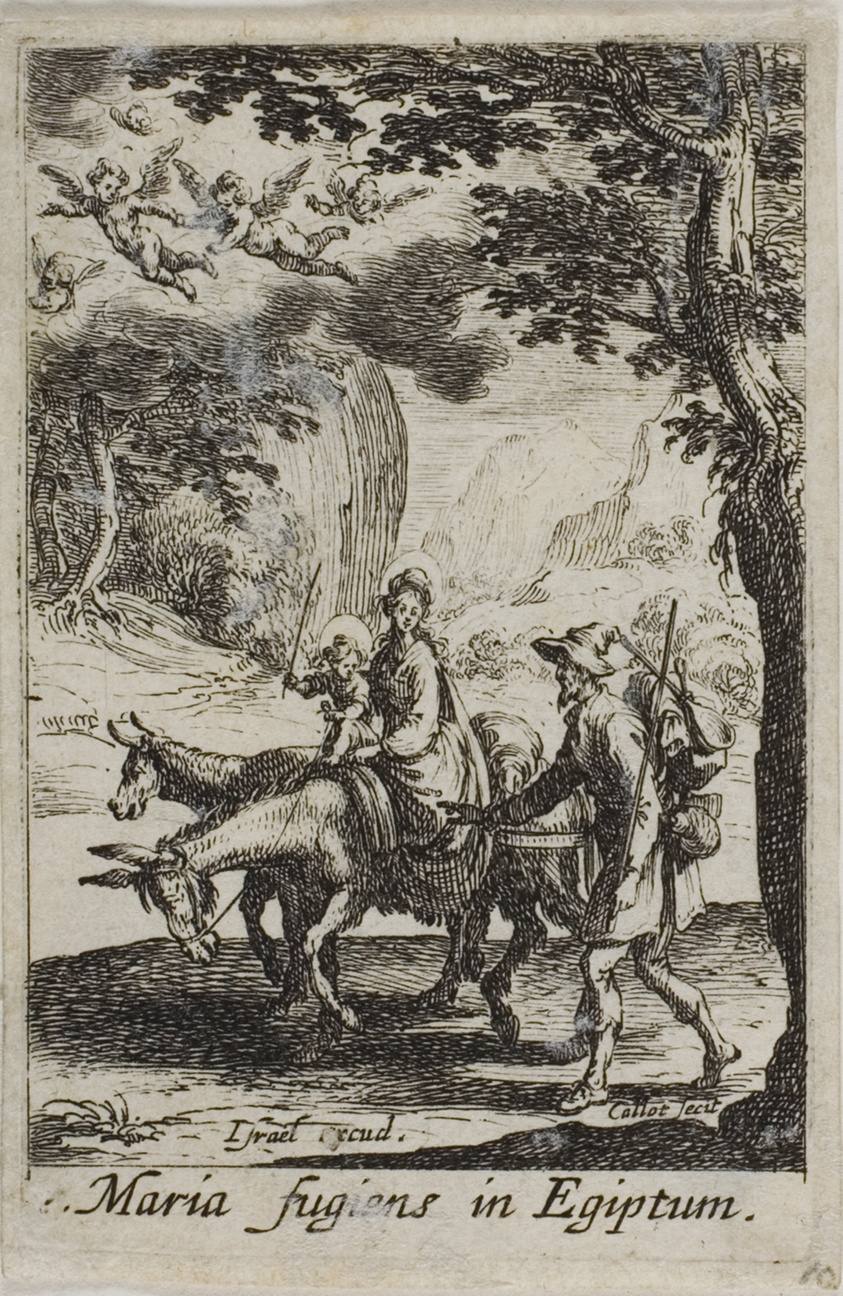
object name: Print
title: The Flight into Egypt, from The Life of the Virgin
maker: Jacques Callot (French, 1592-1635)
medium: Etching on paper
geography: France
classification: etching; print; prints and drawing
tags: Virgin and child/Madonna and child, Christian subjects, mythology, prints and drawings, rest on the flight into egypt, Joseph